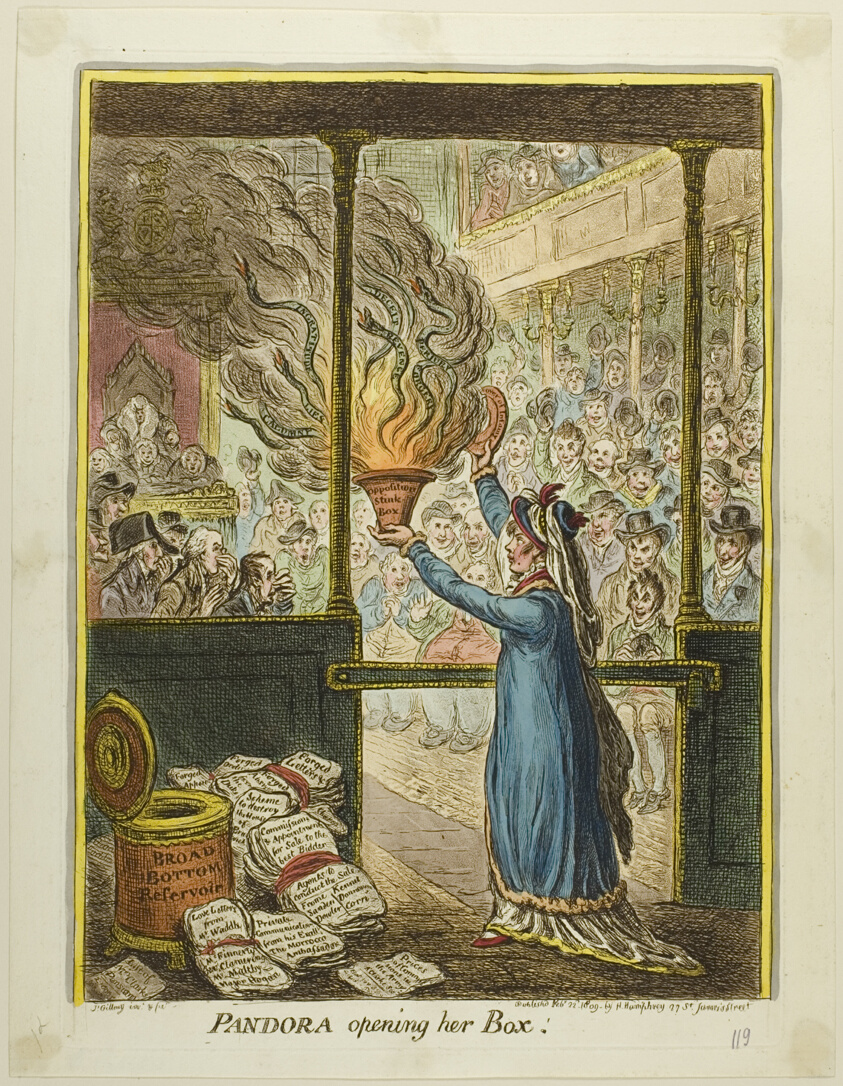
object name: Print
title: Pandora Opening her Box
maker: James Gillray (English, 1756-1815); published by Hannah Humphrey (English, c. 1745-1818)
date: published February 22, 1809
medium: Hand-colored etching on paper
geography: England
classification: etching; print; prints and drawing